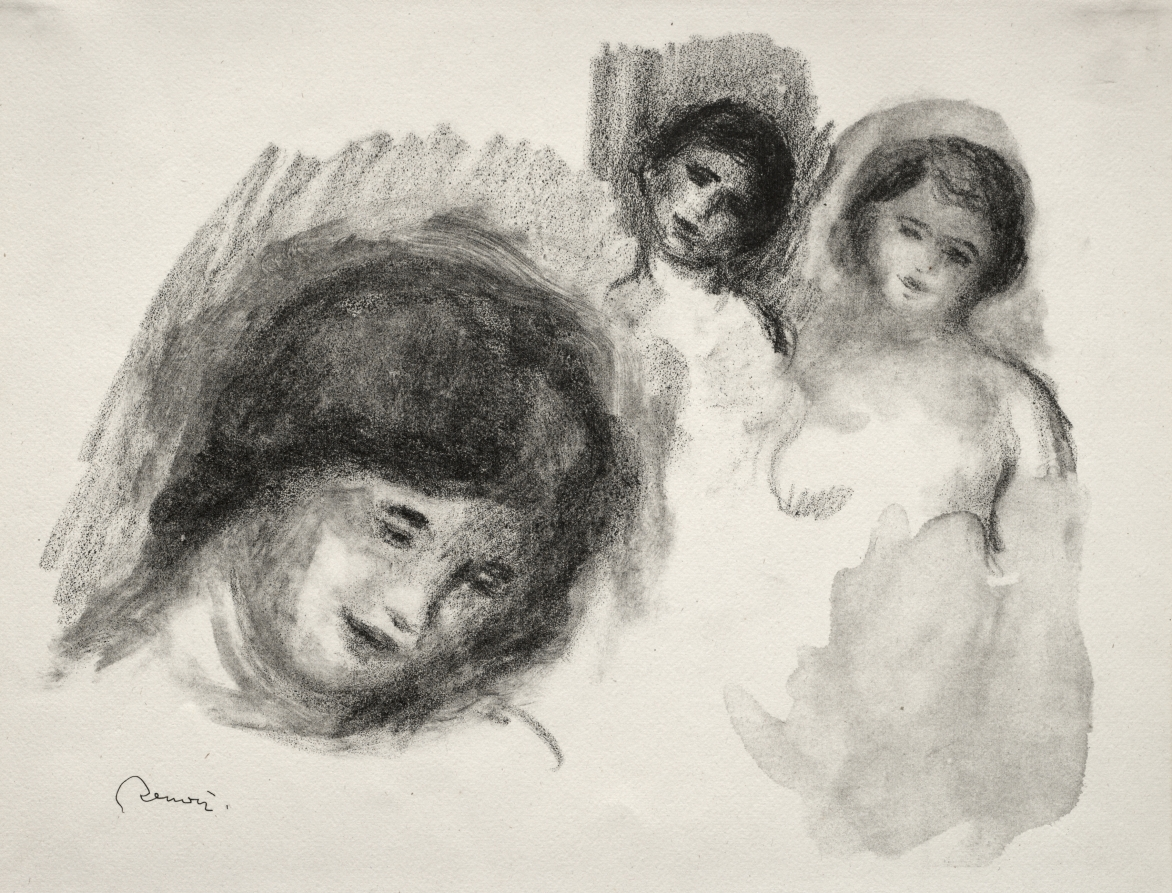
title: Stone with Three Sketches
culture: France, late 19th-early 20th century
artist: Pierre-Auguste Renoir (French, 1841–1919)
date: 1904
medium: lithograph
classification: Print